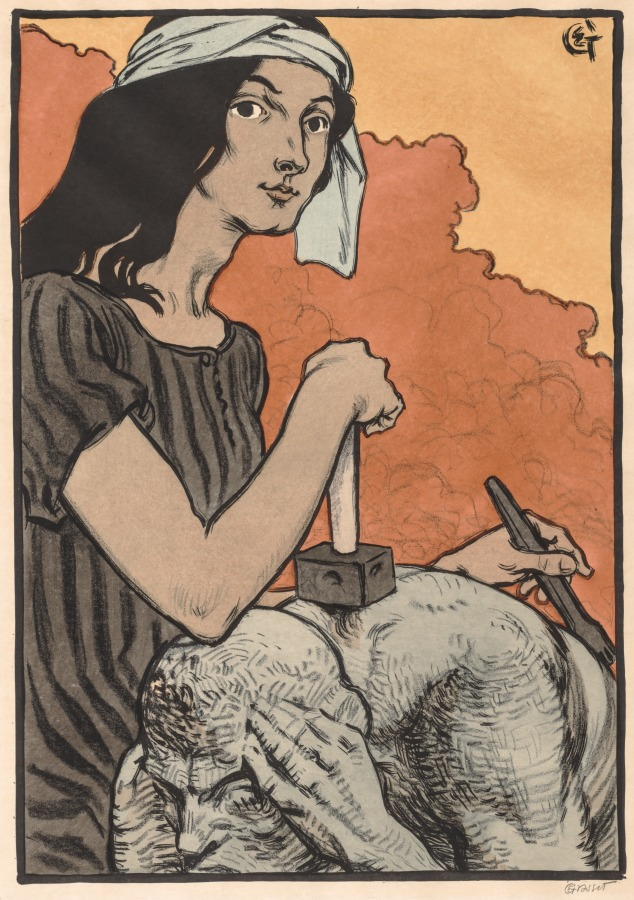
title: Sculptress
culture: France, 19th century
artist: Eugène Grasset (French, 1841–1917)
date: 1897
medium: lithograph with watercolor added by hand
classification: Print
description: Grasset, greatly influenced by the art of Japan, Persia, and Egypt, created designs for stained glass windows, furniture, tapestries, and fabrics. This female allegory of Sculpture was meant for an 1898 exhibition poster. Only the black areas and lines were printed. Rather than using a separate stone to print each color, watercolor was applied with the aid of a stencil.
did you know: Eugène Grasset was himself a sculptor.